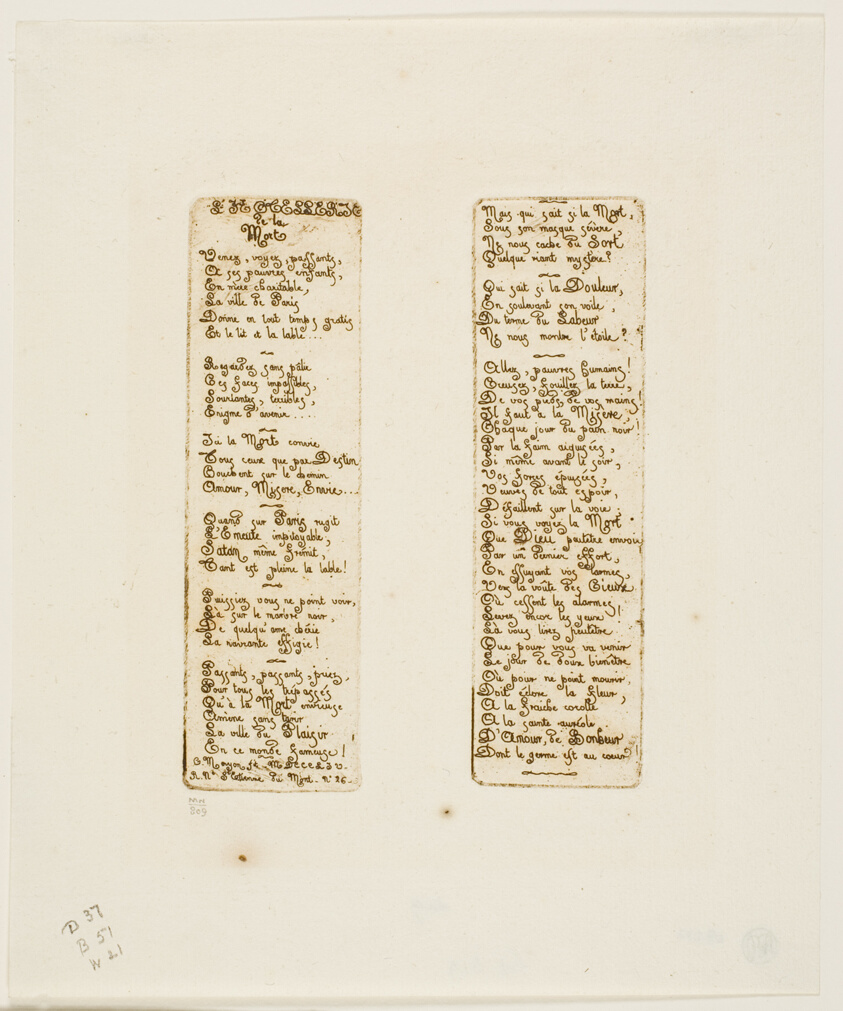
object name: Print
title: Death's Hostel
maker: Charles Meryon (French, 1821-1868)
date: 1854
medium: Etching in brown with two plates side-by-side on ivory laid paper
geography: France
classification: etching; print; prints and drawing